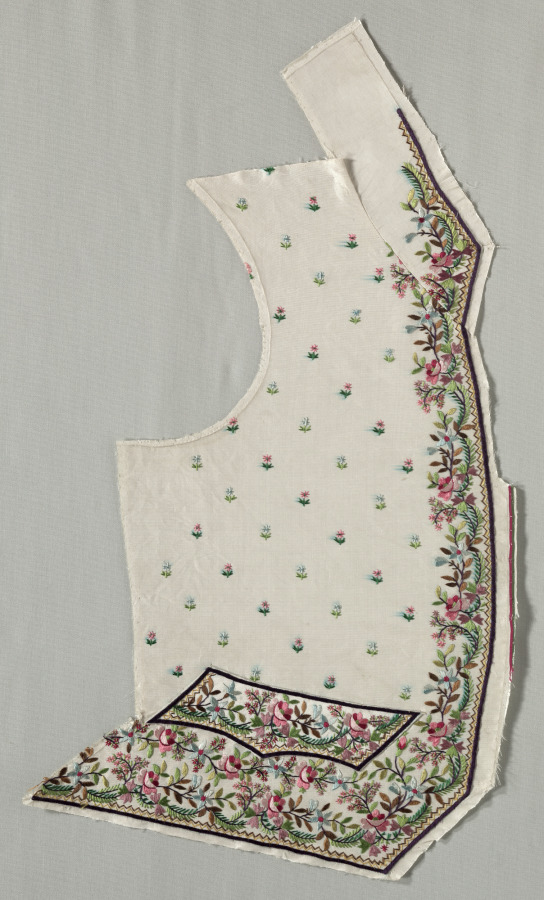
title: Front Half of a Vest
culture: England, late 18th century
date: late 1700s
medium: embroidery, silk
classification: Embroidery